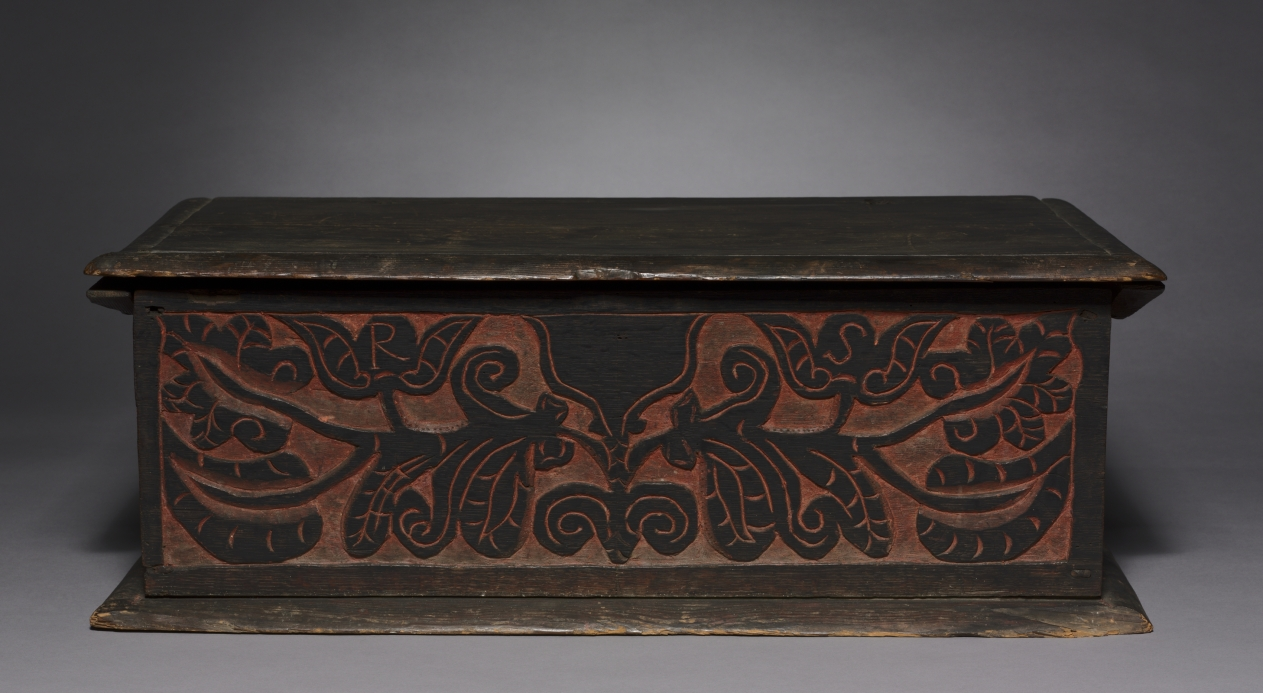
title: Carved Box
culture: America, late 17th century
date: 1680–1700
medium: oak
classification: Wood